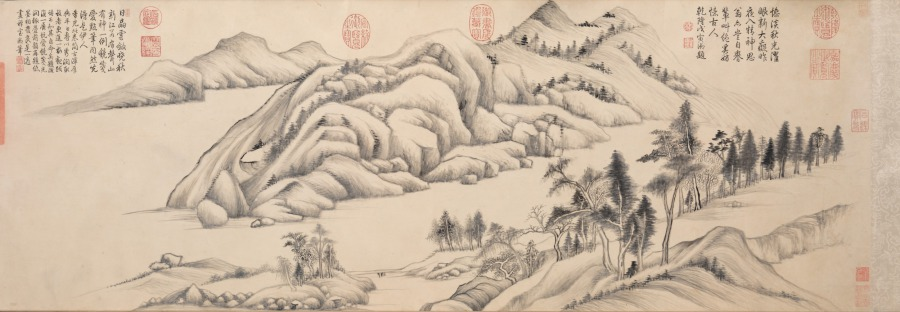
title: River and Mountains on a Clear Autumn Day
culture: China, Ming dynasty (1368–1644)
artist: Dong Qichang (Chinese, 1555–1636)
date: c. 1624–27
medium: Handscroll; ink on Korean paper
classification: Painting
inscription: 黃子久江山秋霽似此，當恨古人不見我也。思翁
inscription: 董文敏每遇高麗鏡面箋，書畫尤為入神。此卷改表紙用之，字跡隱然，兼有朝鮮之印。至於筆法圓秀，真接倪黃。豈文沈所可同日而語也。 康熙庚午中秋後一日，天氣澄爽，重裝初畢，跋於瓶廬。抱瓮翁高士奇。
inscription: Second inscription by Gao Shiqi 高士奇 (1645–1704): On the twenty-third day of the ninth month, the jiaxu year of the Kangxi era [1694], I packed my bags to head north. When my boat passed Wuchang [Suzhou], Mr. Mantang [Song Luo] brought wine to bid me farewell so that we could share our thoughts on our separation in the last few years. I showed him the paintings and calligraphy which I collected and asked his opinions. Since Mr. Mantang does not own any handscrolls by Wenmin [Dong Qichang], I leave this one for him in commemoration of our parting; thus the painting will have a worthy owner and our meeting will become a beautiful story in the future. It is the fourth day after the beginning of winter, with the sky clear and sober. Trees under frost have turned red and yellow, seemingly echoing the brush and ink in the painting. I also ask Mr. Mantang to inscribe a poem to commemorate our meeting so that it will survive forever.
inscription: 1 colophon and 4 seals of Song Luo 宋犖 (1634–1713): Who is the foremost art connoisseur of our dynasty?/ Tangcun [Liang Qingbiao, 1620–1691] is dead, so the title passes to Jiangcun [Gao Shiqi]./ Leaving office, you retired for five years in the Lake region./ Fondling handscrolls and hanging scrolls from morning to evening./ You sent me your collection catalogue Xiao Xia Lu last year;/ It is indeed the true equal of [Zhou Mi's] Yun Yan Guo Yan./ This year you returned to the capital by imperial order;/ Your boat with calligraphy and paintings anchored at the river bank in Suzhou./ When we met each other you did not waste any time for conversation by poured out immediately/ From your "coral net" extraordinary treasures./ You produced incomparable scrolls, with gold-inscribed labels and jade rollers,/ Pouring out from bags and trunks, they were spread in disarray./ Without a word, I rolled and unrolled until my fingers were numbed,/ We sat straight, facing each other quietly, and never felt tired./ For three days we forgot about sleeping and food./ And at times we shouted our joy out loud, forgetting who is host or guest./ Your Dwelling in the Fuchun Mountains and the Yuansheng manuscript/ These peerless works I myself examined with delight./ As an added pleasure to the farewell dinner under the Maple Bridge,/ You allowed me to hold again this handscroll by Dong Qichang--/ The Misty River and Piled Peaks [by Zhao Mengfu] and this Clear Autumn Day are two extraordinary masterpieces./ In showing such life and spirit with "qi yun." the artists were truly "men of heaven."/ The Clear Autumn Day is not even three feet long,/ Painted on tributary Korean paper, it shines like silver./ Every building up and every turn of the mountains imitates nature,/ Every tree and every rock is removed from the commonplace./ From the beginning, the theory of poetry is the theory of painting,/ Like the lotus and the morning sunshine, they complement and refresh each other./ The artist's inscription regrets that "the Old Masters cannot see my scroll."/ Huang Gongwang would have agreed in his grave./ The vermilion of the seals glitter and dazzles the eyes,/ These added accessories are as valuable as jade./ You are very kind to give it to me,/ The feelings expressed in your inscription are so sincere./ Wanting to refuse, but unable, I accept it to respect your wish,/ And taking off my gown and cap I wrapped it with care./ You asked me to write a long poem in commemoration of this beautiful occasion,/ I am too ashamed that my effort in response is so poor and inadequate./ Returning home, I unrolled it under candlelight, trying to write the colophon,/ The light of the waning moon shines at the foot of the mossy wall./ Earnestly humming and brows knit in deep thought, I try to compose;/ The verses are not outstanding, but the facts are real./ With this poem recorded at the end of the scroll, I mail it to you for approval,/ This poem and this painting shall outlast a thousand springs. (Translation by LYSL/HK/WKH)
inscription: 1 colophon and 2 seals of Shao Changheng 邵長蘅 (1637–1704); 2 inscriptions and 14 seals of the Qianlong 乾隆 emperor (r. 1736–95); 1 seal of the Jiaqing 嘉慶 emperor (r. 1796–1820); 3 seals of the Xuantong 宣統 emperor (r. 1908–11); 1 seal unidentified.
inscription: [印] 朝鮮國王之印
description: Dong Qichang had a tremendous impact on the artistic practices and historiography of later generations; his works and writings shaped literati aesthetics. Here, Dong places an abstract landscape composition diagonally across the picture plane, configured to recall earlier masters and simultaneously express his own personal style. Dong’s inscription claims, Huang Gongwang’s Autumn Day, looks like this. I truly regret the master has not seen my work. In fact, Dong Qichang may have had Dong Yuan’s Xiao and Xiang Rivers in mind, a work he owned and considered a key work in Chinese art history.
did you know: The painting has an imprint of a Korean seal that reads "Seal of the king of Joseon."